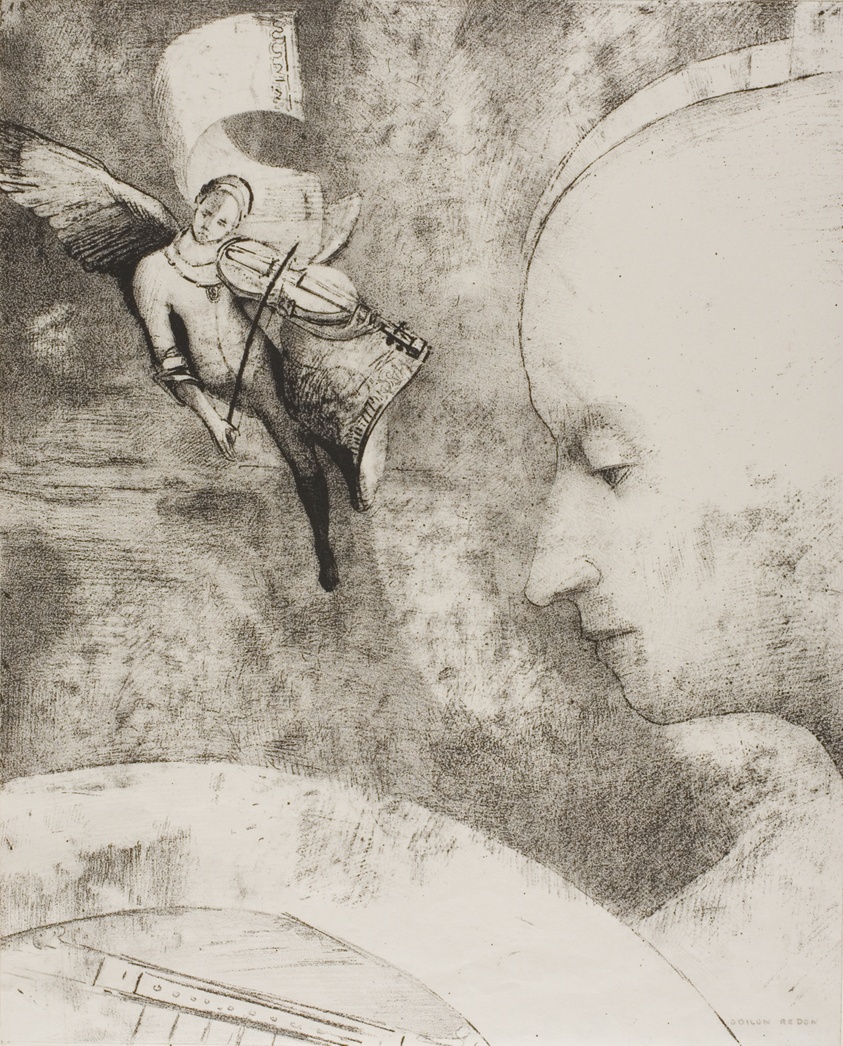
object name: Print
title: The Celestial Art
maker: Odilon Redon (French, 1840-1916)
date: 1894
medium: Lithograph in black on off-white loose chine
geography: France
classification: lithograph; print; prints and drawing; paper